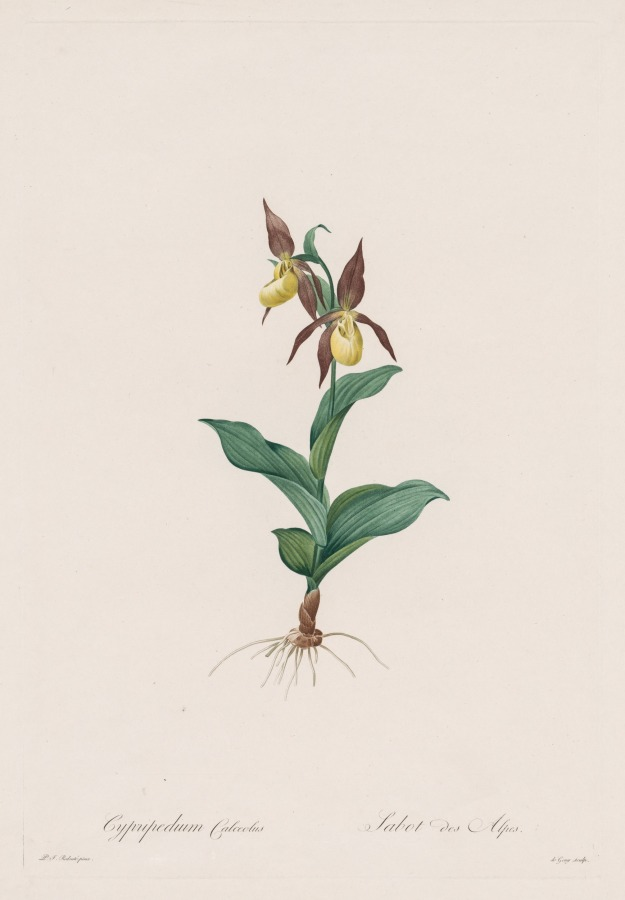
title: Les Liliacées: Cypripedium calceolus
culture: France, 19th century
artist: Henri Joseph Redouté (French, 1766–1853)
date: 1802–1816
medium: stipple and line engraving, with hand coloring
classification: Print